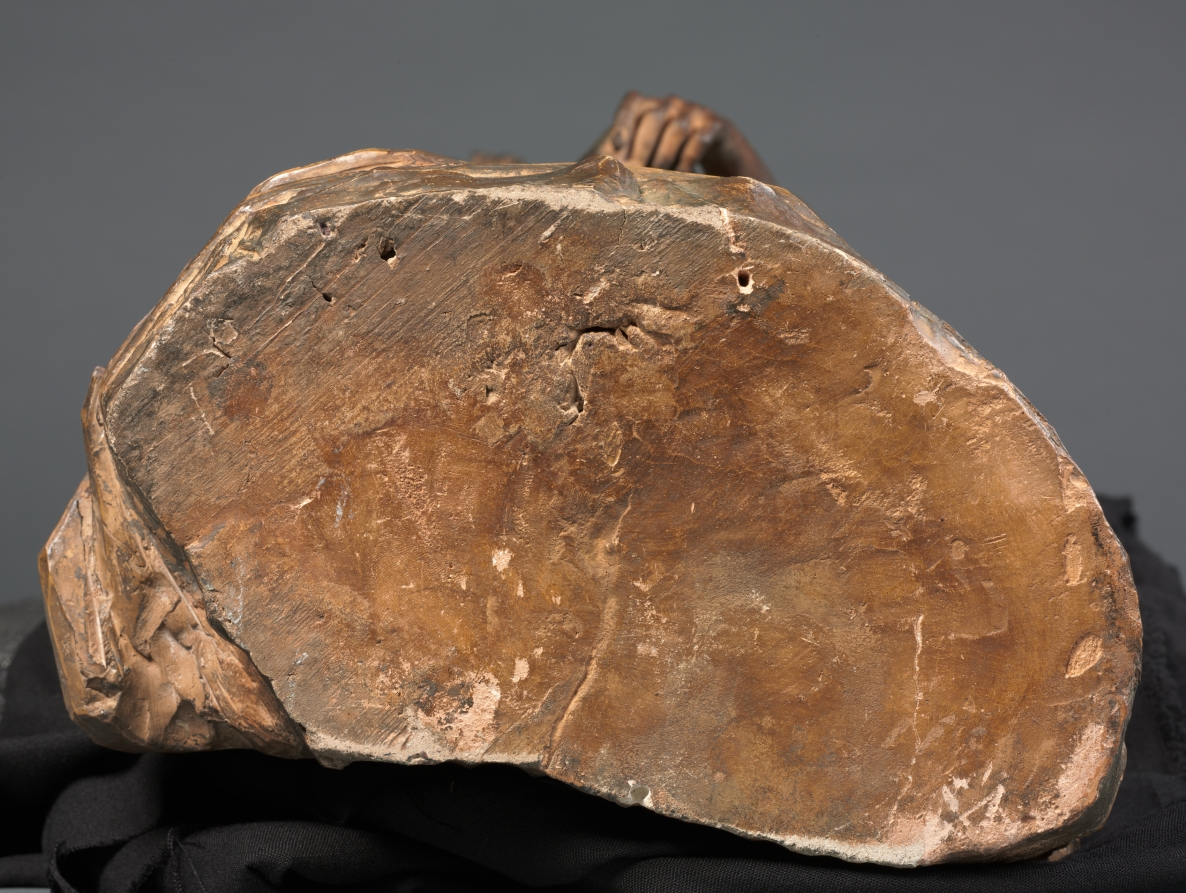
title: Saint John the Baptist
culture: Italy, Florence, 16th century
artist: Master of the Saint John Statuettes (Italian)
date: c. 1500–1525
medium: terracotta with traces of polychromy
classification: Sculpture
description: This statuette belongs to a group of terracotta sculptures representing David (from the OldTestament) and Saint John (from the New Testament) produced by a still unidentified Florentine artist and his studio in the late 1400s and early 1500s. Giventheir scale, it seems likely that these sculptures were intended for use in private homes rather than churches.